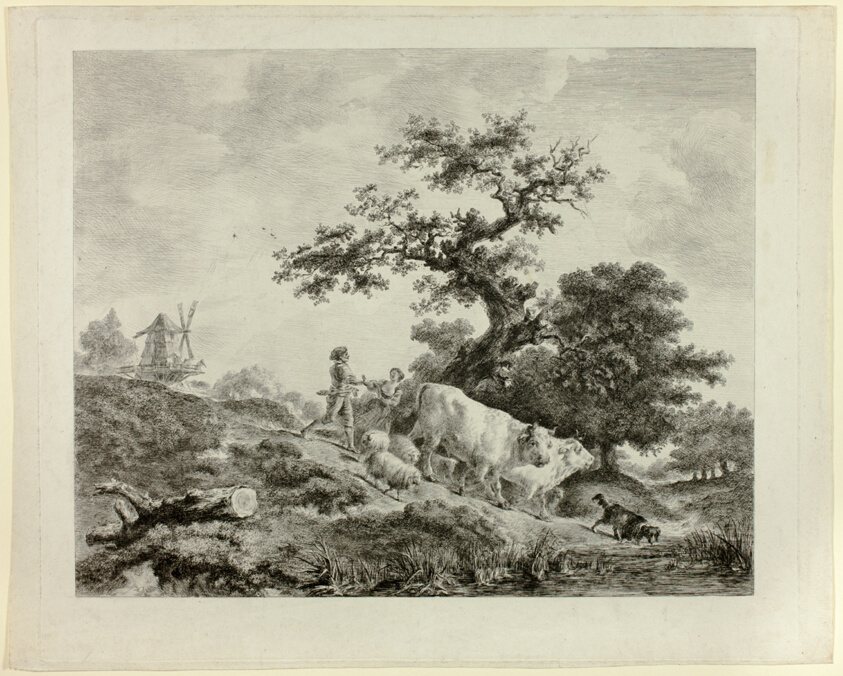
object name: Print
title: Landscape with Windmill, Young Man and Girl, and Two Oxen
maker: Dominique-Vivant Denon (French, 1747-1825); after Jean-Honoré Fragonard (French, 1732-1806)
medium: Etching in black on ivory laid paper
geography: France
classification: etching; paper; print; prints and drawing